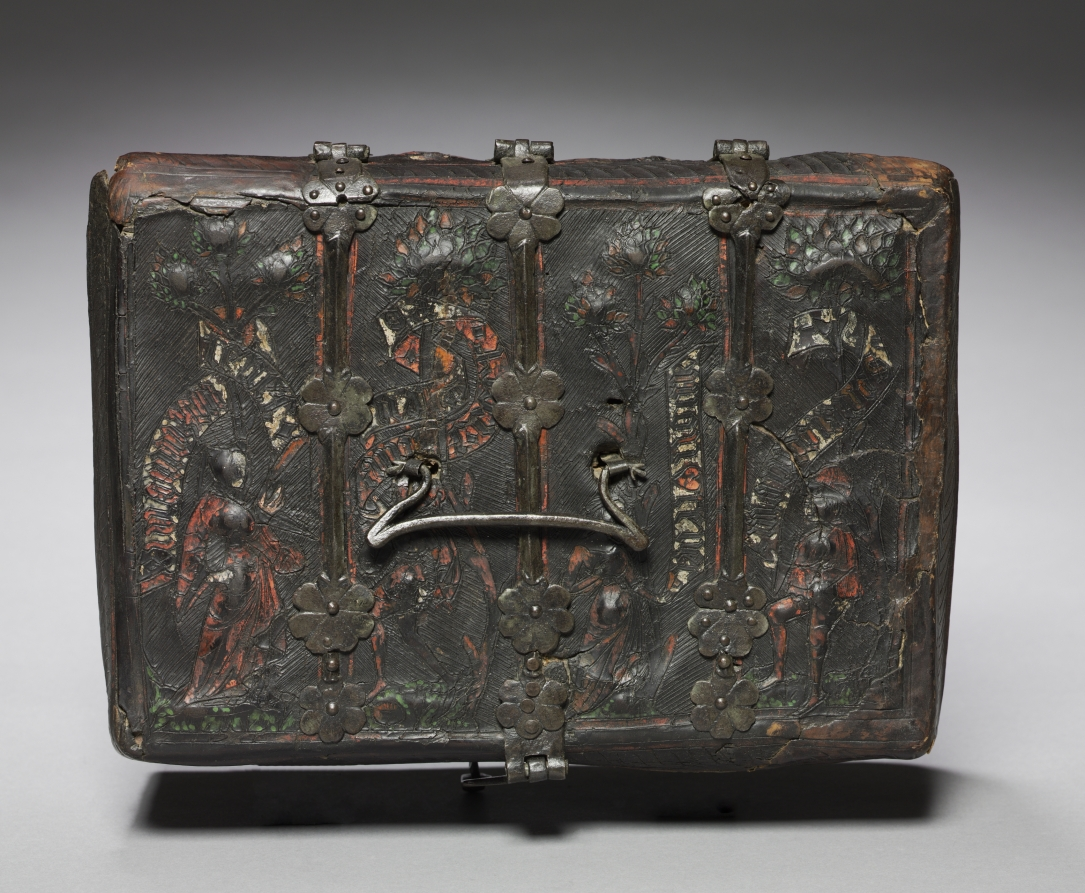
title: Leather Casket with Scenes of Courtly Love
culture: France, Gothic period, 2nd half of the 14th century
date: c. 1350–1400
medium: Leather: embossed, incised; iron mounts; wood core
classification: Leather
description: During the Middle Ages, small boxes like this were produced for the secular market. Used for storing personal items, the boxes typically consisted of a wood core that might be decoratively painted and gilded or covered with another material, such as ivory or leather. Manufactured in small, highly specialized leather workshops, these richly embellished caskets were valued furnishings in the homes of the aristocratic clientele that commissioned them. On the lid of this box, a couple is shown with banderoles inscribed in Old French with expressions of mutual love. "Hold my heart," requests the lady. "But you already have it," replies the man. On the front of the casket, the man, holding a heart, appears again and states, "Have it once more."